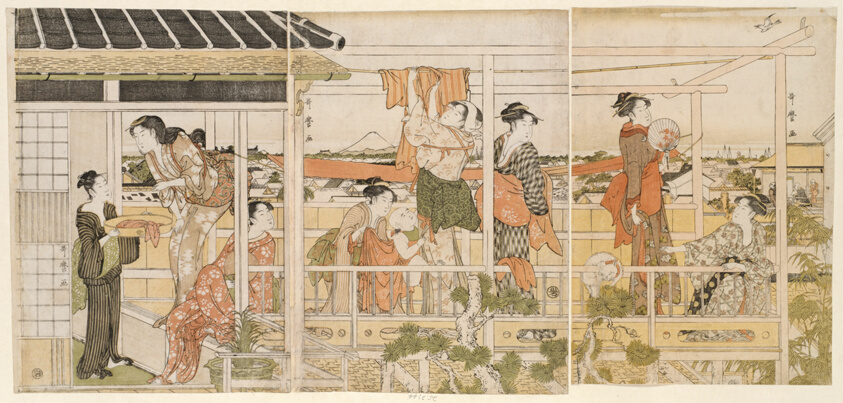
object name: Print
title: Drying Clothes (Monohoshi)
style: Japanese (culture or style)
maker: Kitagawa Utamaro 喜多川 歌麿; Japanese, 1753 (?)-1806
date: c. 1790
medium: Color woodblock prints; oban triptych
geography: Japan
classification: woodblock print; print; asian art